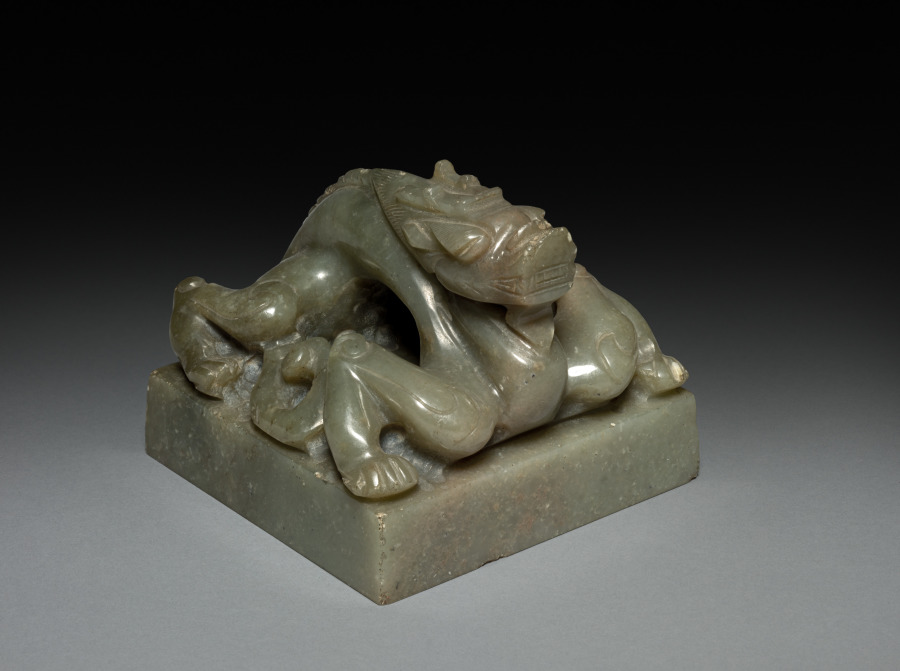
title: Seal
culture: China, Qing dynasty (1644-1911)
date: 1700 or later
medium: Jade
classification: Jade